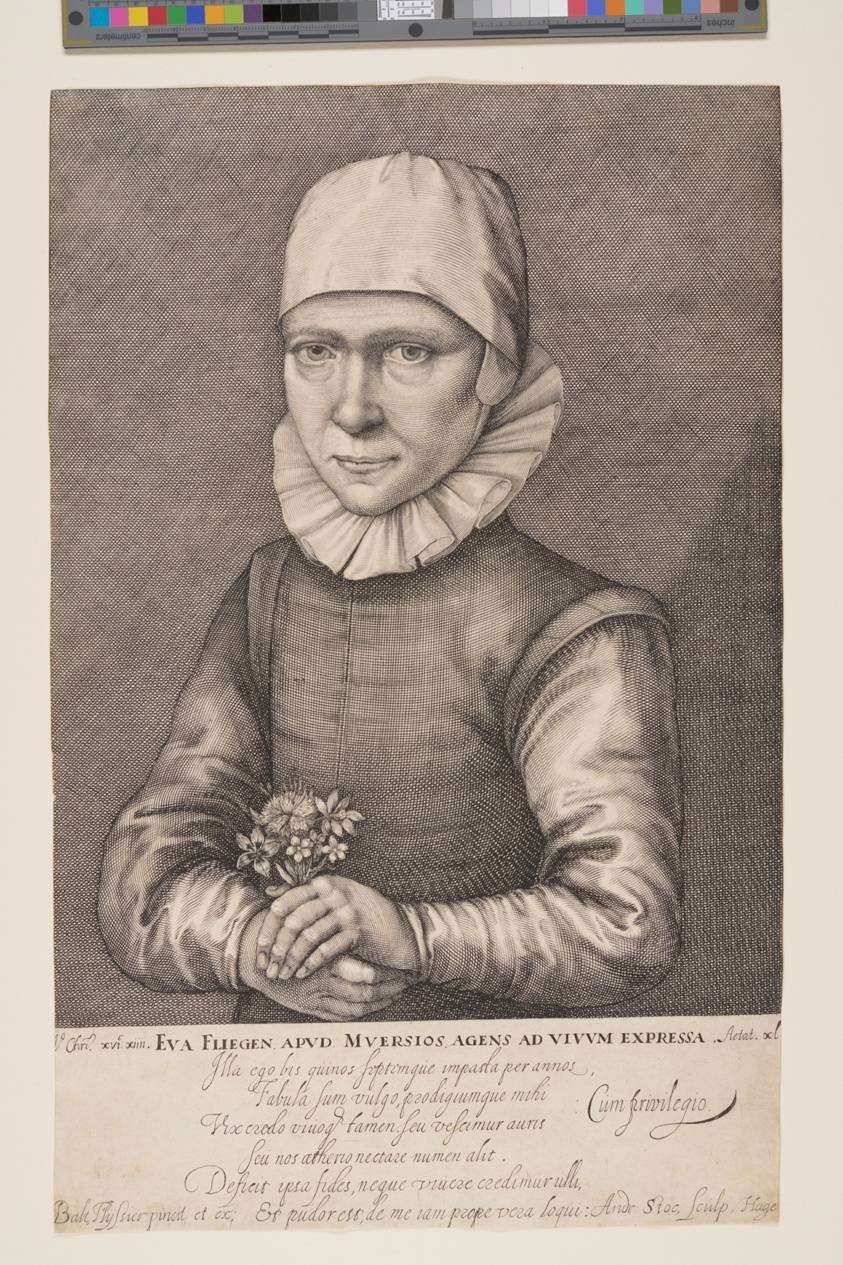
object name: Print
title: Eva Fliegen van Meurs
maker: Andries Jacobsz. Stock (Dutch, c. 1580–c. 1648); after Balthasar Flessiers (Dutch, c. 1550-c.1626)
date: 1614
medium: Engraving on ivory laid paper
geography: Netherlands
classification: print; paper; prints and drawing; engraving